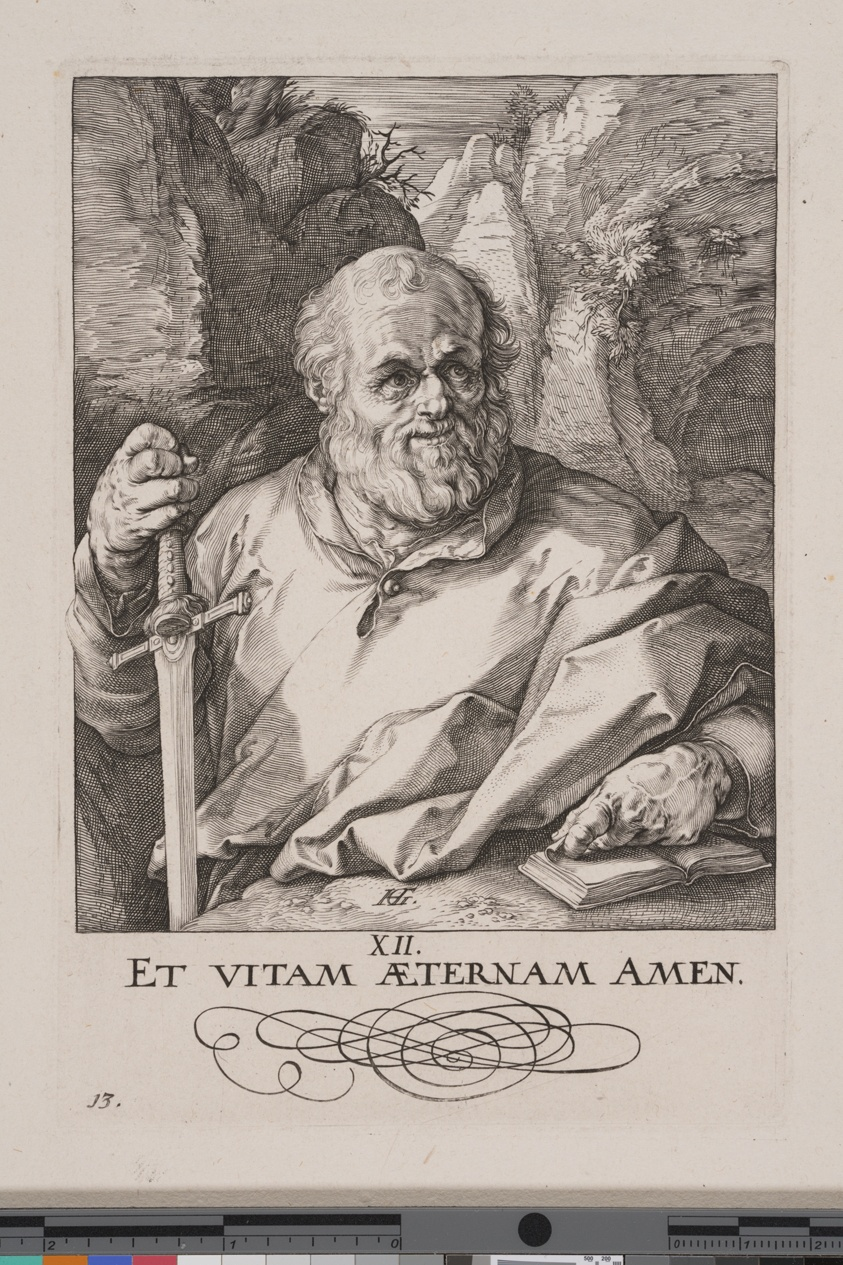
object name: Print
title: St Matthias, from Christ, the Apostles and St Paul with the Creed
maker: Hendrick Goltzius (Dutch, 1558–1617)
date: 1589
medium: Engraving on ivory laid paper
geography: Netherlands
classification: print; paper; prints and drawing; engraving